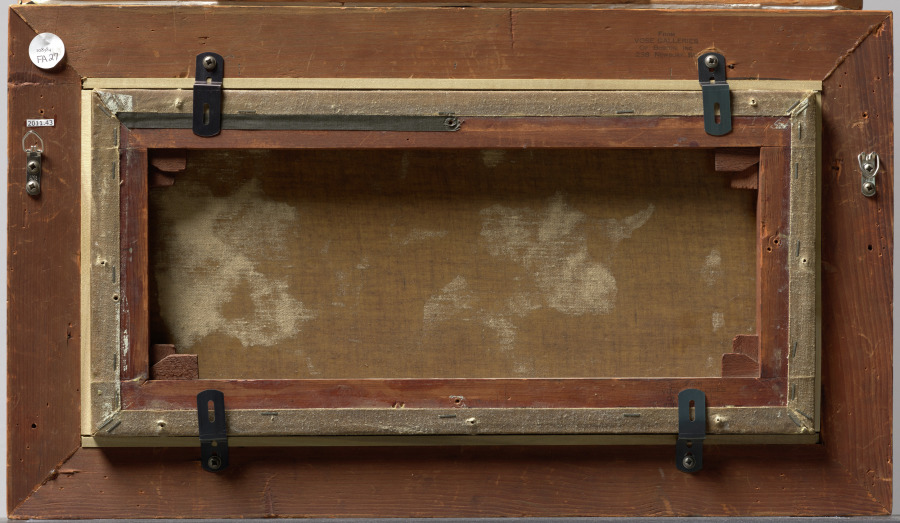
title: Haverstraw Bay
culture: America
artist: Sanford Robinson Gifford (American, 1823–1880)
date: 1868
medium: oil on canvas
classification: Painting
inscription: Signed lower left: S.R. Gifford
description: Located about 40 miles north of New York City, Haverstraw Bay is the widest point on the Hudson River. During the 1860s, it was a prime area for shad fishing, and Gifford’s painting records this activity taking place amid a delicately luminous morning haze.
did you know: Commercial and recreational fishing for now endangered American shad is currently prohibited on the Hudson River.